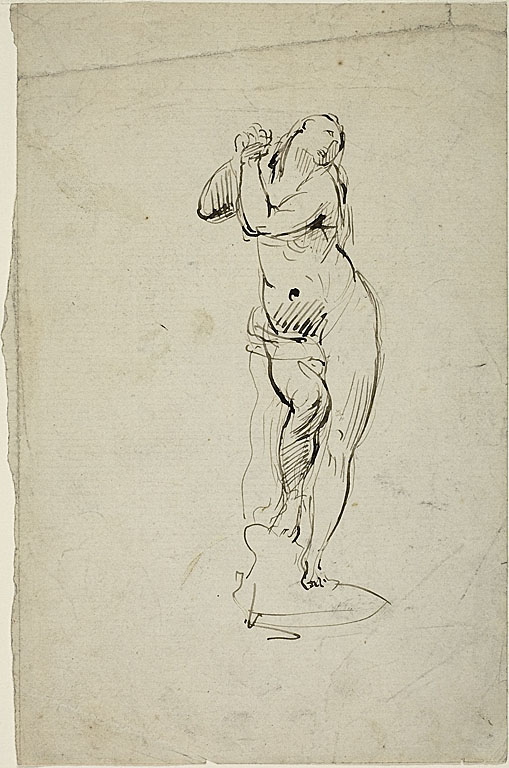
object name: Drawing and Watercolor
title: Standing Woman with Clasped Hands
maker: Jean Baptiste Carpeaux (French, 1827-1875)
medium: Pen and brown ink on ivory laid paper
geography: France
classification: pen and ink drawings; drawings (visual works); prints and drawing